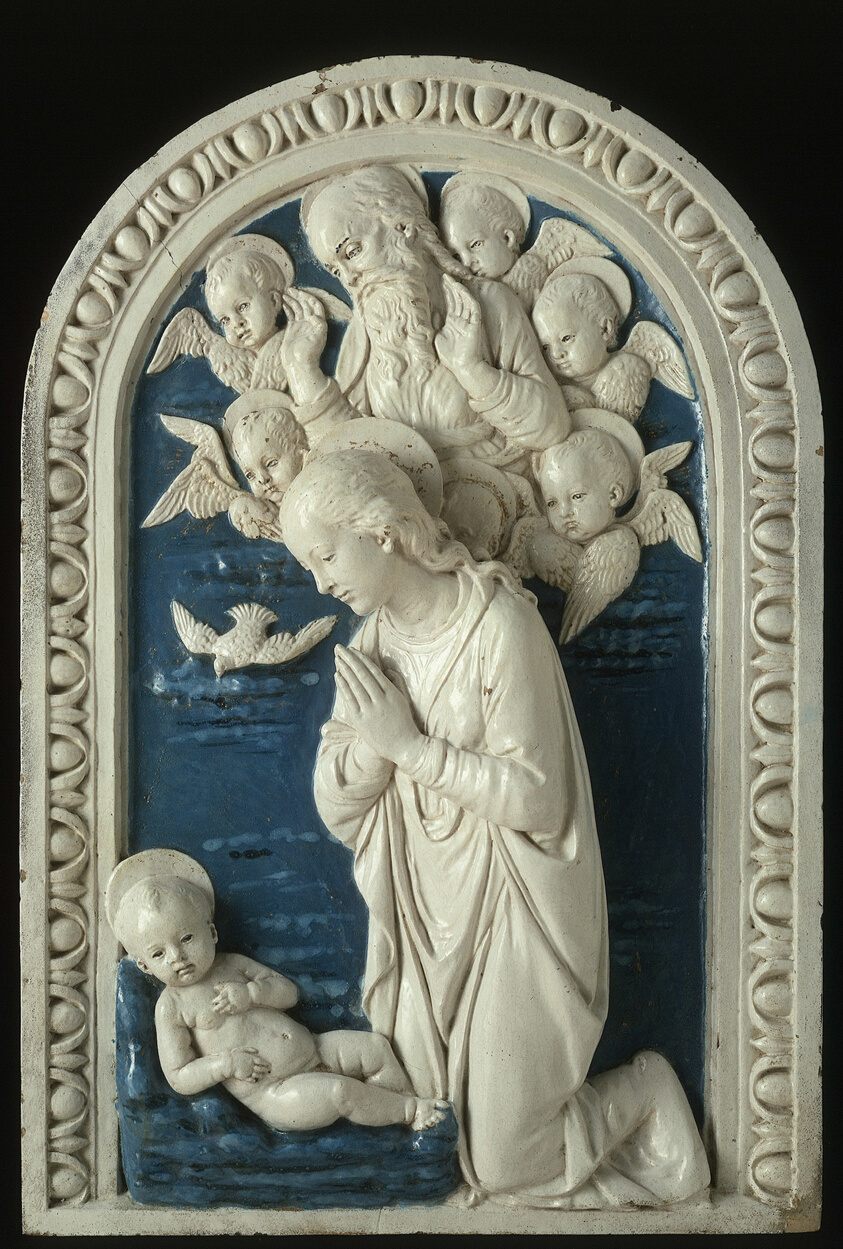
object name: Sculpture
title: Adoration of the Christ Child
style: 15th century, Renaissance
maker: Workshop of Andrea della Robbia (Italian, 1435–1525)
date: After 1479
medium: Terracotta and polychrome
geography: Italy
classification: relief; sculpture; Italian; terracotta (sculpture)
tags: Virgin and child/Madonna and child, Christian subjects, Christianity, religious scenes, religious figures, religious, religion, white (color), blue (color), blue, cherubs, bird, doves, holy family, angels, Virgin Mary, woman, children, child, babies, Jesus